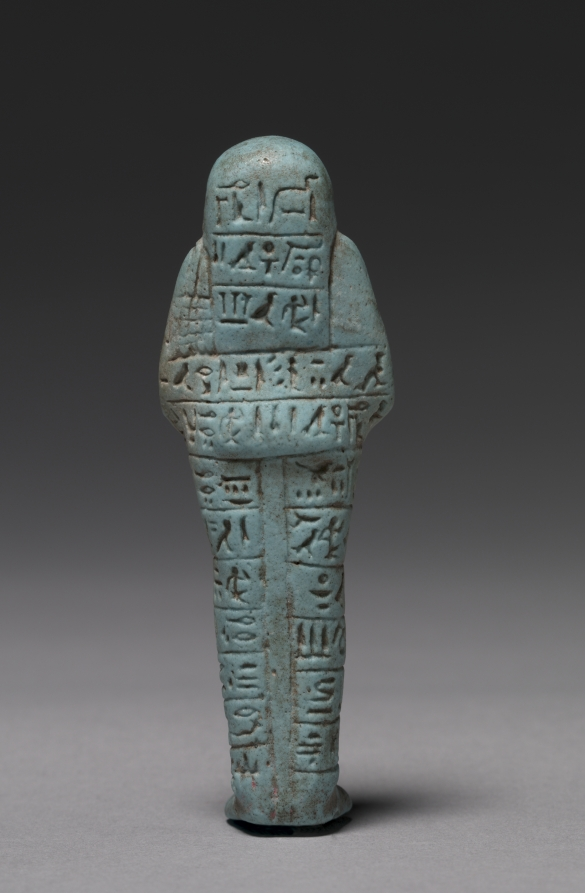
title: Shawabty of Ankh-Hor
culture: Egypt, Thebes, Late Period, Dynasty 26, reign of Psammetichus II-Apries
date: 595–586 BCE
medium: pale turquoise, vitreous Egyptian blue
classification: Funerary Equipment